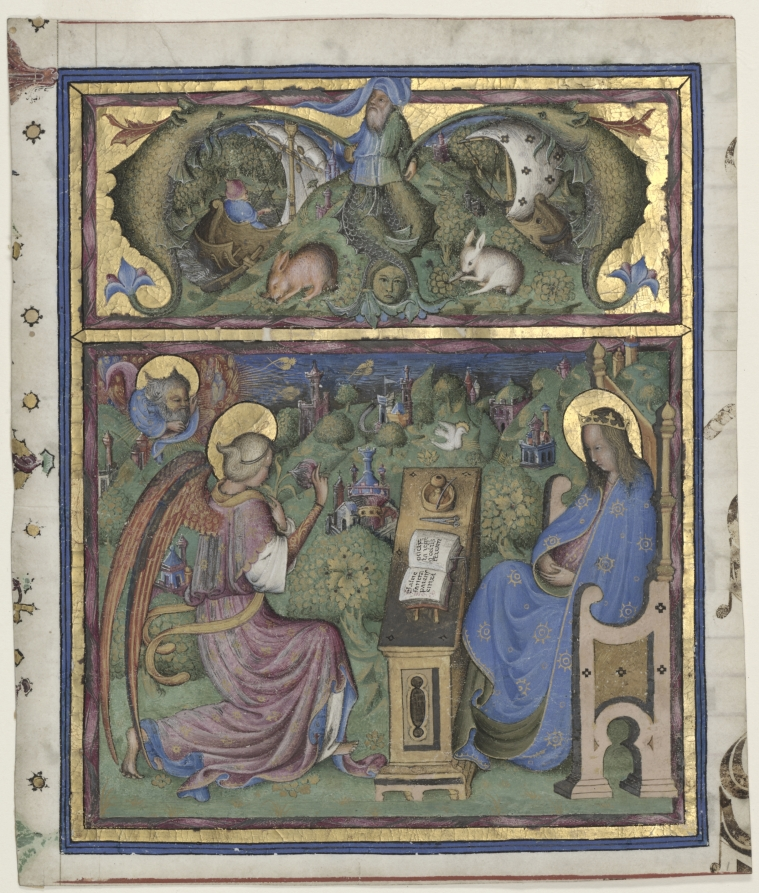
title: Initial M[issus est] Excised from an Antiphonary: The Annunciation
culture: Italy, Lombardy, 15th century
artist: Stefano da Verona (Italian, c. 1375–1438)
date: 1430–1438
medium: ink, tempera, and gold on vellum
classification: Manuscript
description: This masterful initial M, colorful and crowded with playful animals and fantastic forms, recalls the announcement to the Virgin Mary by the Angel Gabriel that she will conceive and bear a son: Missus est Gabriel Angelus ad Miriam Virginem. . . . (The Angel Gabriel was sent to Mary. . . .), the response for the first Sunday in Advent. The decorated initial is related in style to a set of choir books made by Belbello for the Church of Saints Giovanni e Paolo in Venice. Belbello's style has been associated with another artist, the Master of the Murano Gradual, with whom he possibly collaborated in Venice. Belbello's career placed him in Milan, Mantua, Pavia, and Venice. His services were highly sought after by Renaissance princes, and his style was influential and widespread in northern Italy.